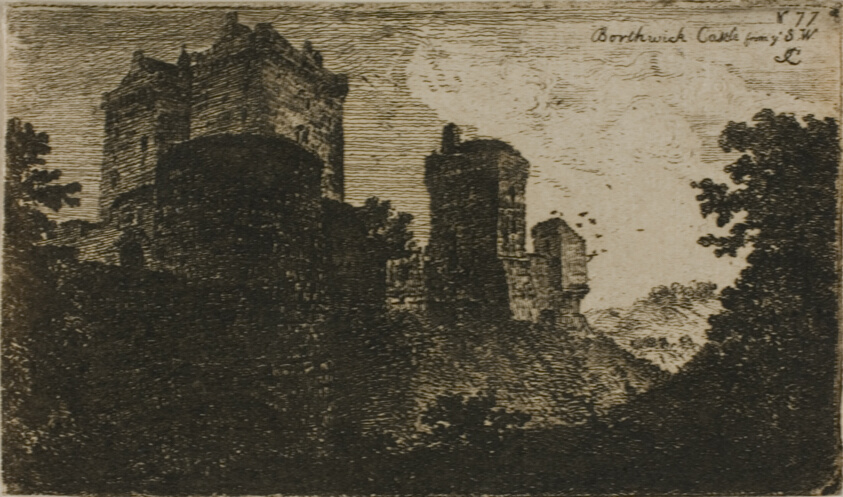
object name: Print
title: Borthwick Castle from the Southwest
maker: John Clerk of Eldin (Scottish, 1728-1812)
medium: Etching on paper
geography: Scotland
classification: etching; print; prints and drawing